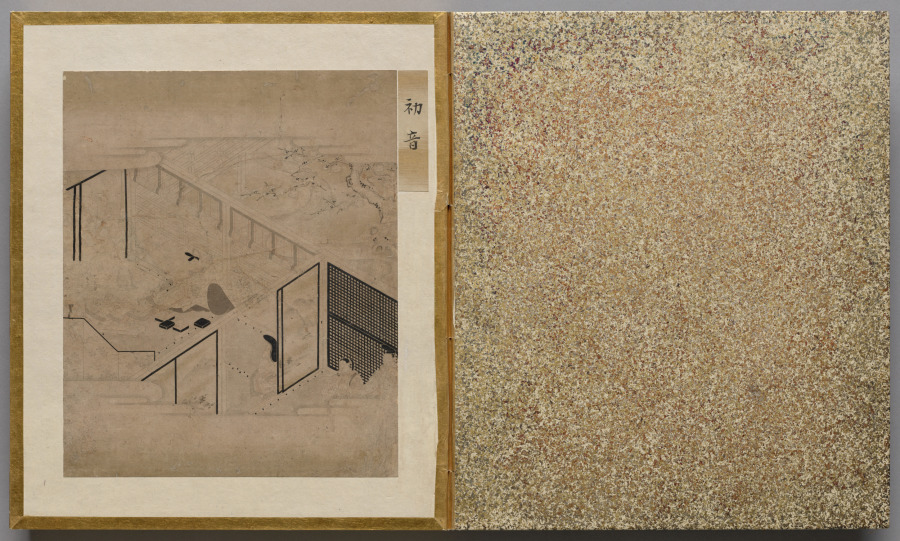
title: First Warbler from Album of Illustrations for the Tale of Genji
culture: Japan, Edo period (1615–1868)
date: 1600s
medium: painting in an accordion-style album; ink, light color, and gold on paper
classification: Bound Volume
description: This album contains illustrations for the classic literary work the Tale of Genji, authored in the 1000s by Murasaki Shikibu, an aristocrat of the Heian period (794–1185) court. The scenes are painted in the “white drawing” (hakubyō) mode, in which a fine ink line is used to depict figures and spaces with great subtlety, punctuated only occasionally by traces of red pigment for a character’s lips, a detail of a garment, or a decorative element. These two scenes illustrate episodes from the chapters “Thin Veil of Cloud” (Usugumo) and “Barrier Gate” (Sekiya).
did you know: The illustrations are identified by chapter title in cartouches to the upper right of the paintings.